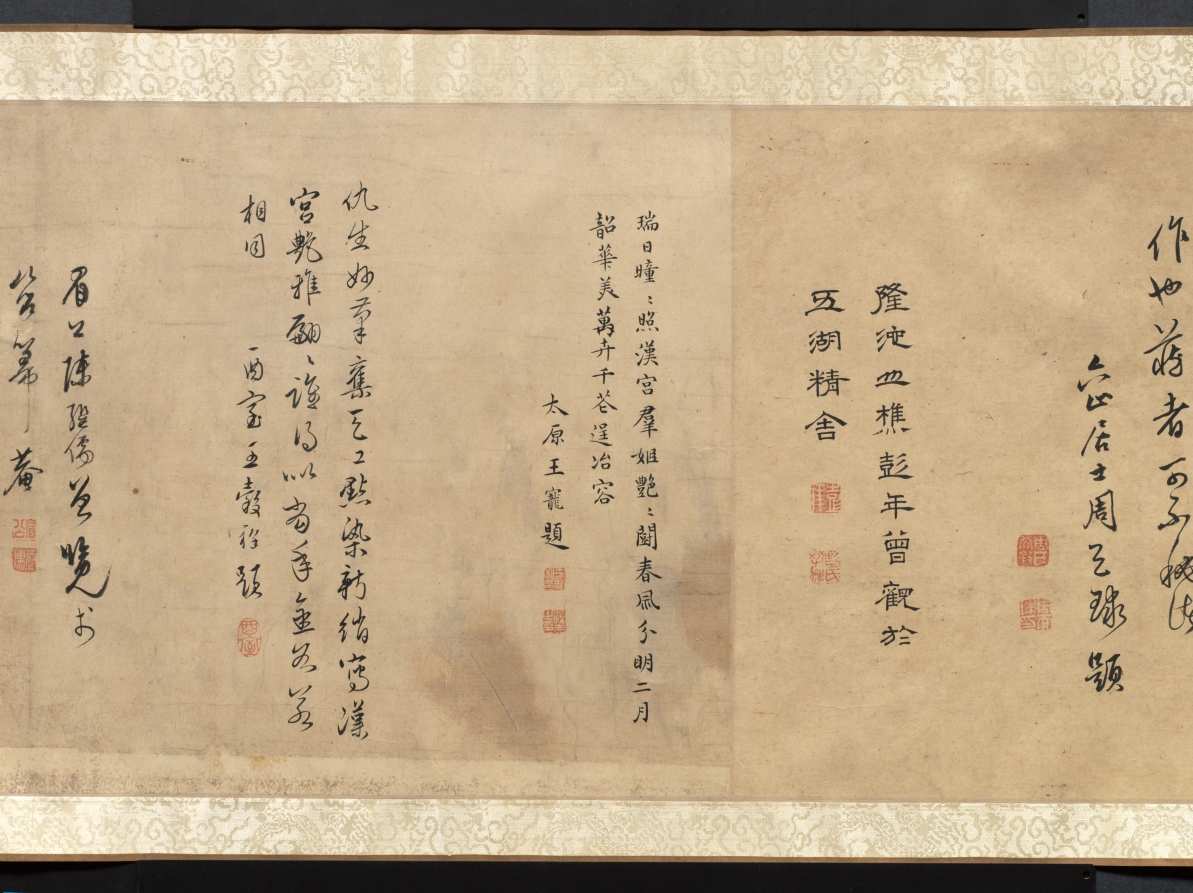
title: Palace Ladies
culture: China, Qing dynasty (1644-1911)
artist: copy after Qiu Ying (Chinese, 1494–1552)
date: 1644–1911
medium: handscroll, ink and color on silk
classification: Painting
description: This handscroll illustrates the pursuits of court ladies in a palace precinct on a spring day. Women, young girls, and their maids amuse themselves by sitting on a swing, playing games, watering and admiring peonies, performing music together, playing the qin (zither), feeding a parrot on the balustrade and fish in the water, or catching butterflies. The life of elite women was mostly restricted to the so-called inner quarters, meaning the garden and inner courts of the house. This painting idealizes the world of young palace girls that in fact was often filled with boredom and waiting for a lover.